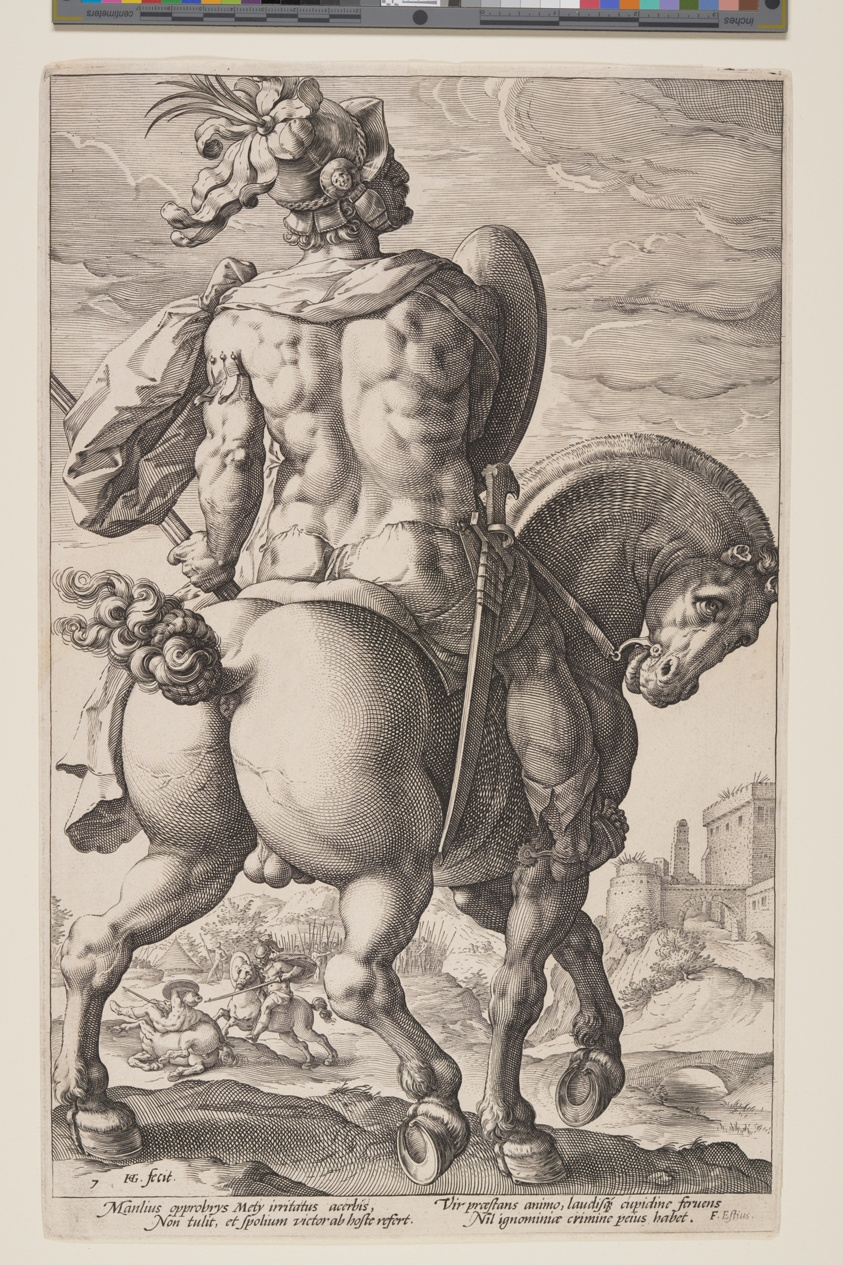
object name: Print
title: Titus Manlius on Horseback, from The Roman Heroes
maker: Hendrick Goltzius (Dutch, 1558–1617)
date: 1586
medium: Engraving on ivory laid paper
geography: Netherlands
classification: print; paper; prints and drawing; engraving